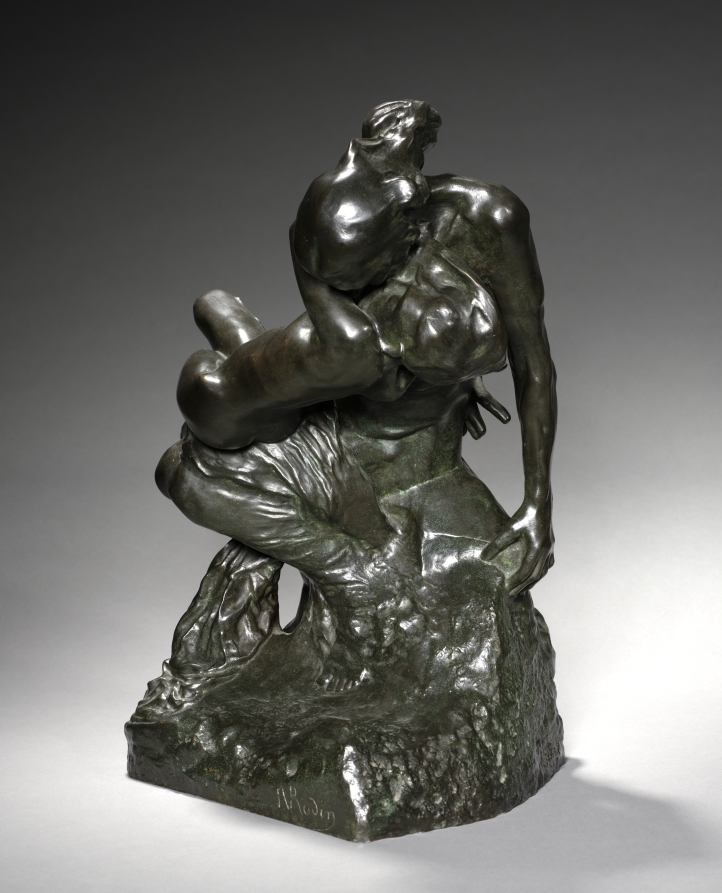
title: Triumphant Youth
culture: France, 19th century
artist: Auguste Rodin (French, 1840–1917)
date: c. 1894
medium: bronze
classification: Sculpture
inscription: Signed front left: "A. Rodin"